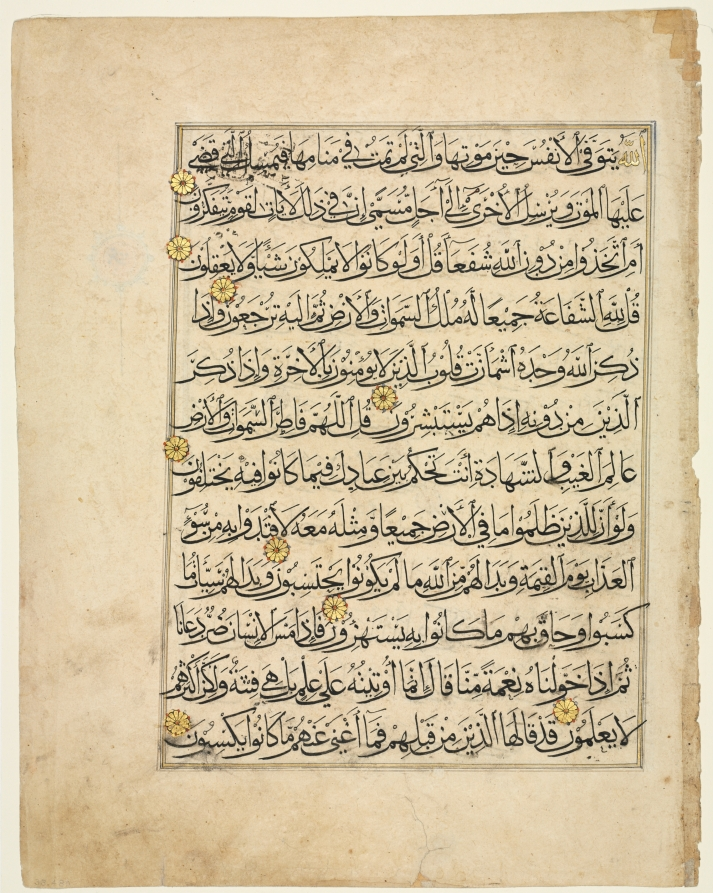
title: Qur'an Manuscript Folio (recto)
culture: Egypt, Mamluk sultanate (1250–1517)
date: 1300s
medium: ink, gold, and colors on paper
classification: Drawing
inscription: Surah al-Zumar [Chapter: The Crowds] 39: 42-50 in Arabic. Script: Rayhani, twelve lines to a page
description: The text includes verses from the Chapter 39 of the Qur’an, "Surah al-Zumar." The Arabic text is written in Rayhani script, one of the six official scripts of Perso-Arabic calligraphy, and ornamented with red, blue, and gold rosettes.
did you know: The text is from the Chapter 39 of the Qur'an, "Surah al-Zumar"; verses 42–50 are on the recto, 51–60 are on the verso.